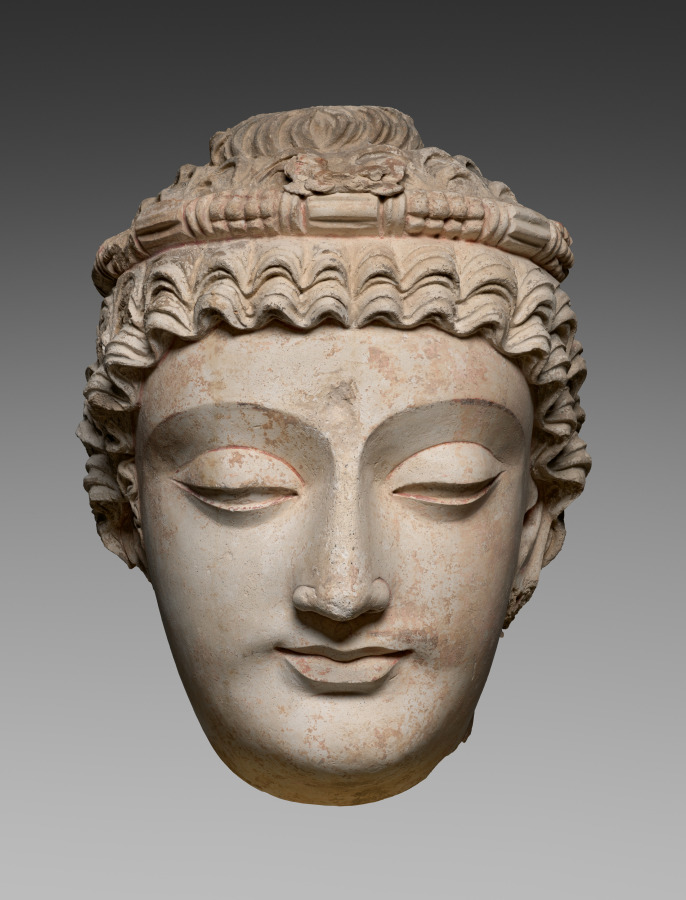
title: Head of Bodhisattva Avalokiteshvara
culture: Afghanistan or Pakistan, Gandhara, Kushan period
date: 300s–400s CE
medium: stucco with traces of paint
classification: Sculpture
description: By this period, individual bodhisattvas were beginning to be revered as ideal figures who would deliberately postpone their own enlightenment and entrance into final nirvana, which is a state from which no one returns to be reborn into this world. Bodhisattvas accomplish all but the final meditation leading to full enlightenment, but they are considered to be so advanced in their practice and realization that they have the ability to control their rebirth and act in righteous and compassionate ways to help others achieve enlightenment. Because the remains of a lotus pedestal on which a Buddha sat is at the center of the diadem, this head can be identified as that of the Bodhisattva of Compassion. The idealized linearity of the brows and eyes along with the formalized waves of hair give an ethereal quality to the otherwise naturalistic face.